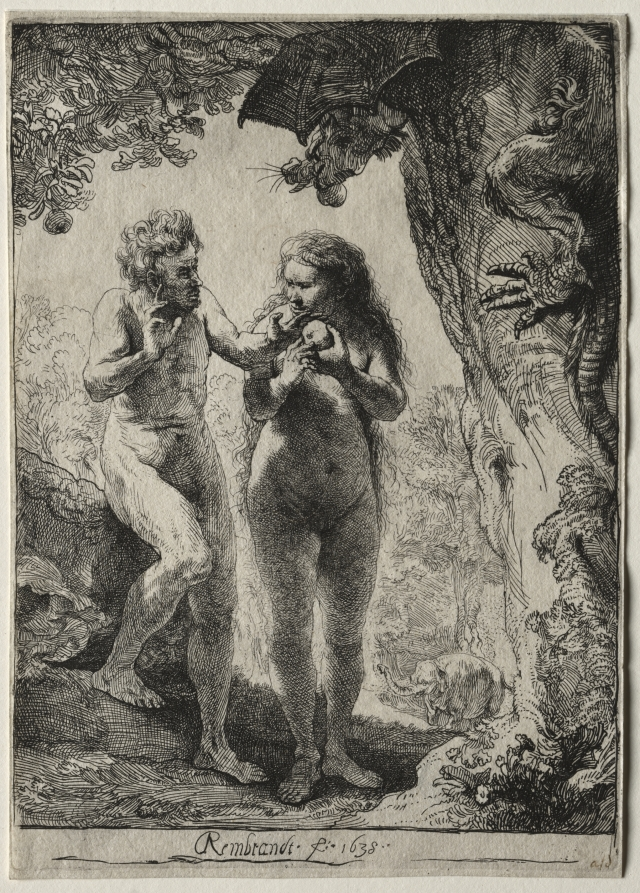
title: Adam and Eve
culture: Netherlands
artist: Rembrandt van Rijn (Dutch, 1606–1669)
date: 1638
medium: etching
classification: Print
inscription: lower center, in plate: Rembrandt· f·1638· ; lower right, in pen and brown ink: a/d ; VERSO, upper right, pen and ink: [illegible] ; lower center, in pen and brown ink (faded): [WR?] ; lower center, in graphite: [illegible] ; lower right, in graphite: [illegible]